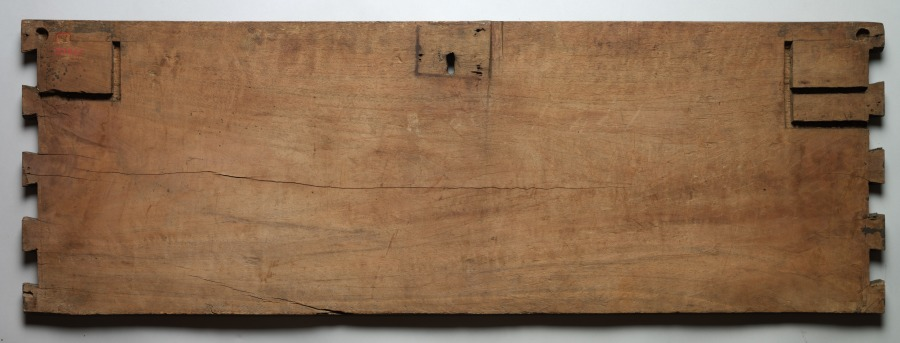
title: Chest Front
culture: India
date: 1700s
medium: wood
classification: Wood